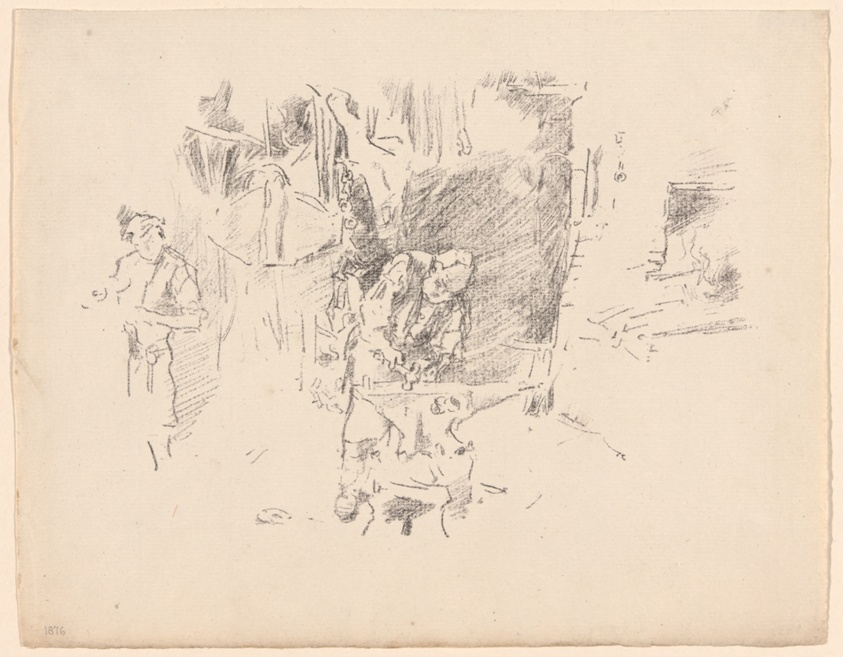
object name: Print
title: The Sunny Smithy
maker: James McNeill Whistler (American, 1834-1903)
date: 1895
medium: Transfer lithograph in black on ivory laid paper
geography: United States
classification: transfer lithograph; lithograph; print; prints and drawing; paper